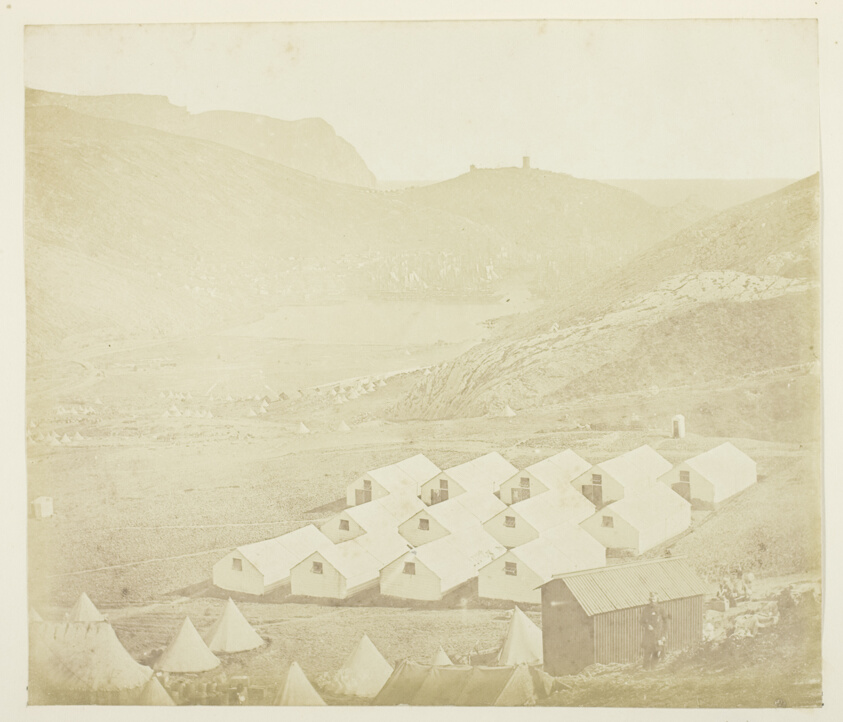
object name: Photograph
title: Harbour of Balaklava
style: 19th century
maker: James Robertson (Scottish, c. 1813–d. after 1881)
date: 1855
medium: Albumen print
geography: Scotland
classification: unidentified; photography; photograph